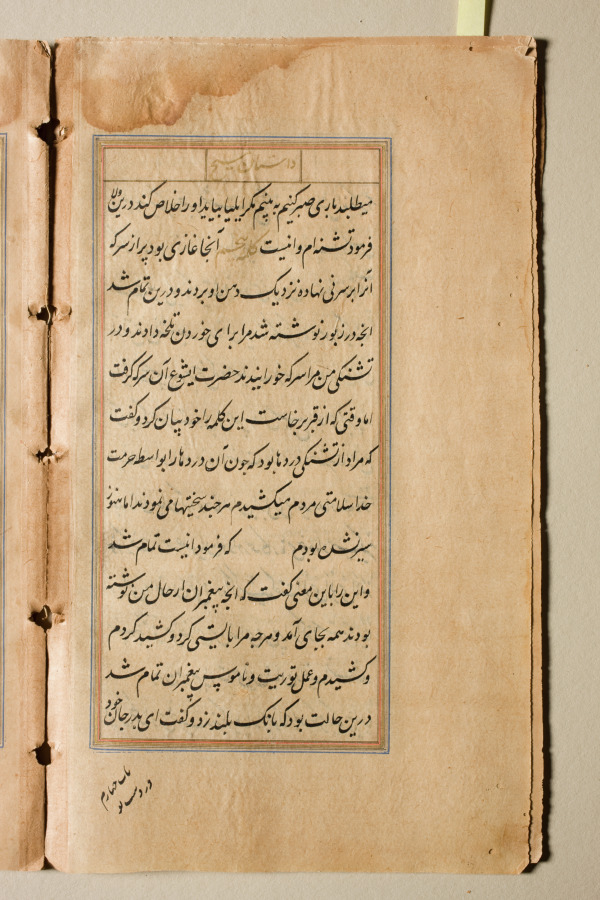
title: Text page from a Mirror of Holiness (Mir’at al-quds) of Father Jerome Xavier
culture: Mughal India, Allahabad, made for Prince Salim (1569–1627)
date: 1602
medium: Ink and gold on paper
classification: Manuscript